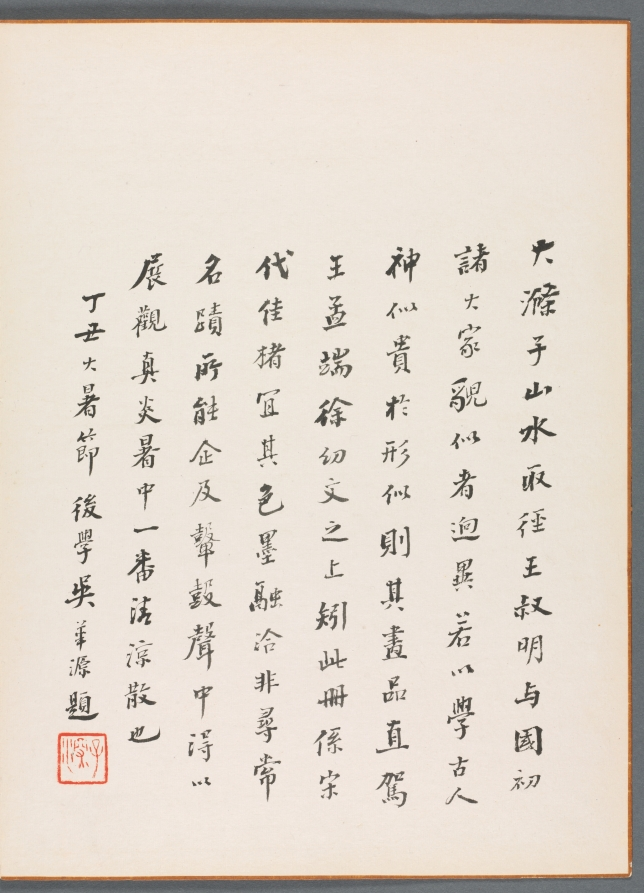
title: Reminiscences of Qinhuai River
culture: China, Qing dynasty (1644-1911)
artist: Shitao (Chinese, 1642–1707)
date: 1642–1707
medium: Album of eight leaves, ink and color on Song paper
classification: Painting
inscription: 大滌尊者濟 [印]原濟; 石濤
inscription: 沿溪四十九迴折，搜盡秦淮六代奇。/ 雪霽東山誰着屐，風高西壑自成詩。/ 應憐孤冷長無伴，其剩槎牙只幾枝。/ 滿地落花春未了，酸心如豆耐人思。/ 仲賓先生以宋紙十幅寄余真州命畫。因憶昔時秦淮探梅聚首之地，寫此就教。清湘石濤濟道人。[印]原濟; 石濤.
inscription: 2 colophons and 15 additional seals: 1 colophon, dated 1937, and 1 seal of Wu Huayuan 吳華源 (1893–1972); 1 colophon, dated 1938, and 2 seals of Wu Hufan 吳湖帆 (1894–1968); 1 seal of C. C. Wang 王季遷 (1907–2003); 11 seals unidentified.